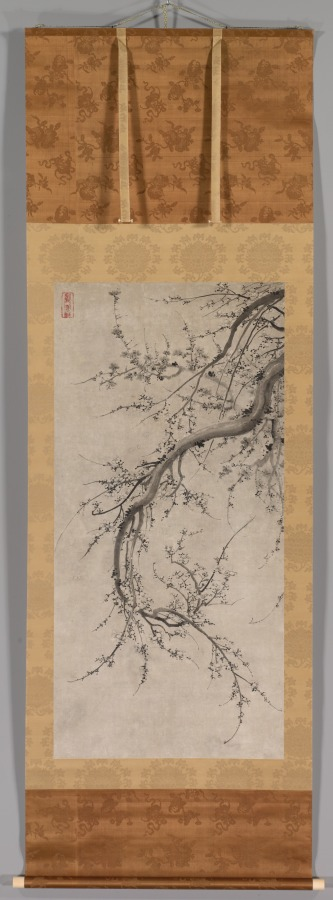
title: Prunus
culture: Japan, Edo period (1615–1868)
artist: attributed to Kano Einō (Japanese, 1631–1697)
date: mid- to late 1600s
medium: hanging scroll; ink on paper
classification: Painting